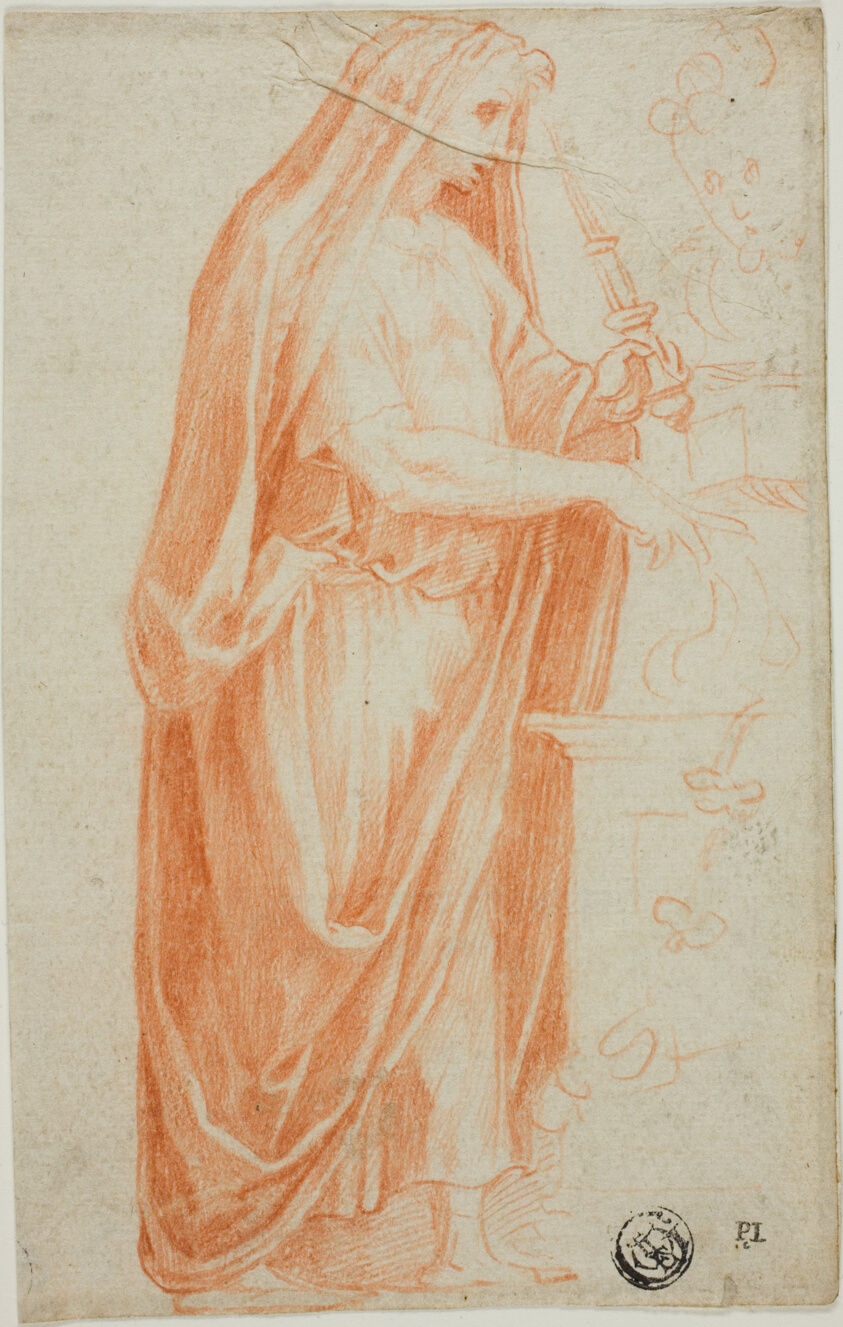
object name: Drawing and Watercolor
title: After the Antique: Roman Officiant at a Sacrificial Altar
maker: Francesco de'Rossi, called Salviati; Italian, 1510-1563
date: 1531/32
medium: Red chalk on ivory laid paper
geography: Italy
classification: chalk; drawings (visual works); prints and drawing